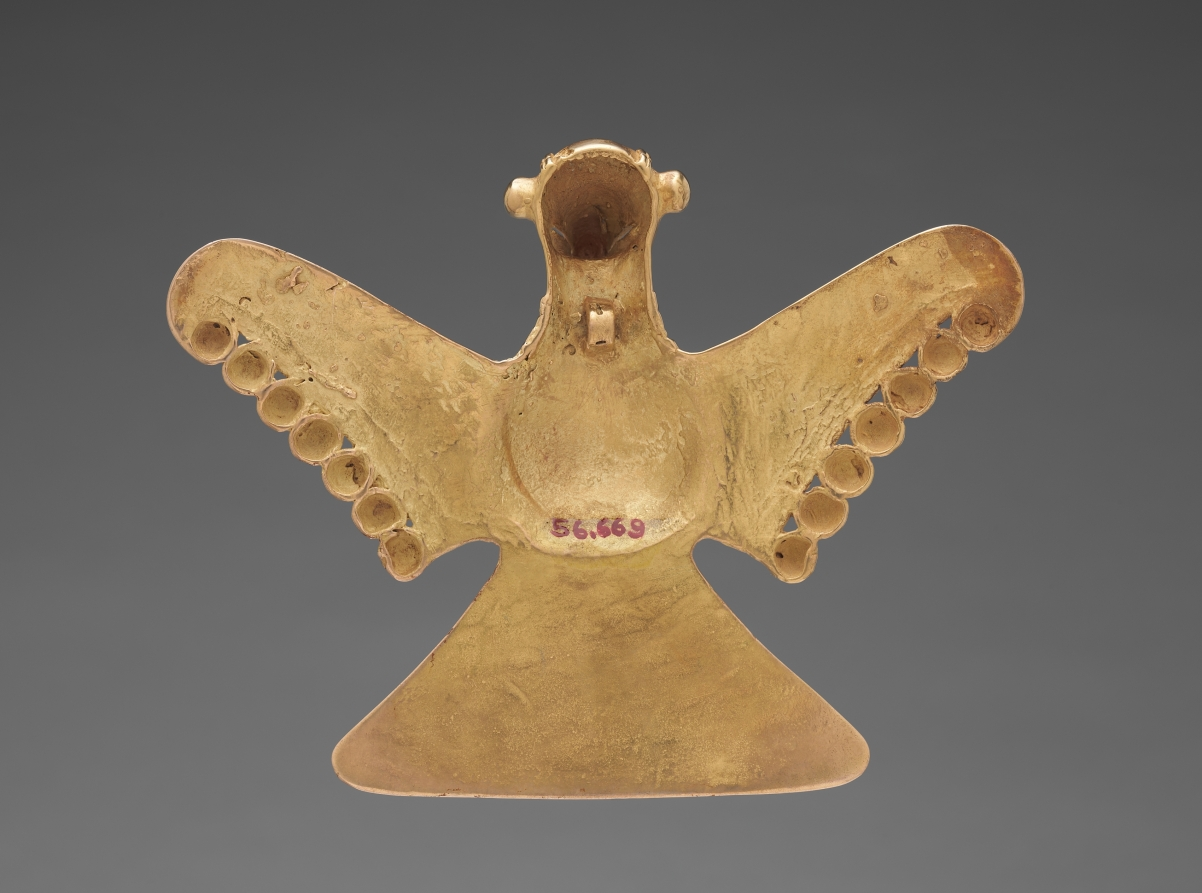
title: Bird Pendant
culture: Panama, Veraguas-Chiriquí style, 11th - 16th century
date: c. 1000–1550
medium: cast gold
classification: Metalwork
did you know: In the Panama-Costa Rica region, gold ornaments were associated with political and religious authority.